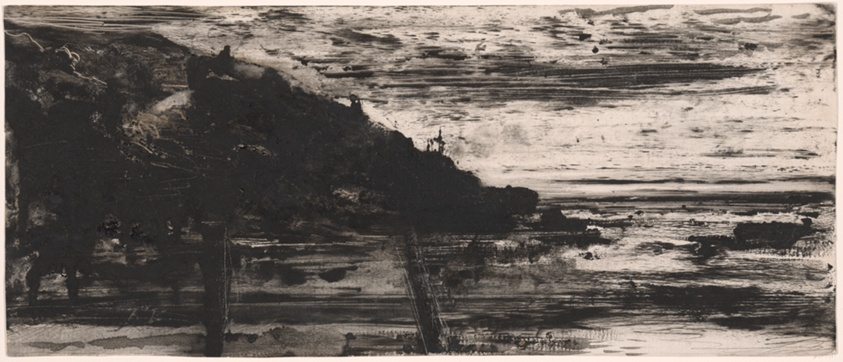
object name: Drawing and Watercolor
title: Seascape at Dinard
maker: Félix Buhot; French, 1847–1898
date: c. 1889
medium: Monotype in black, with black ink wash, on cream laid paper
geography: France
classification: prints and drawing; monotype; paper